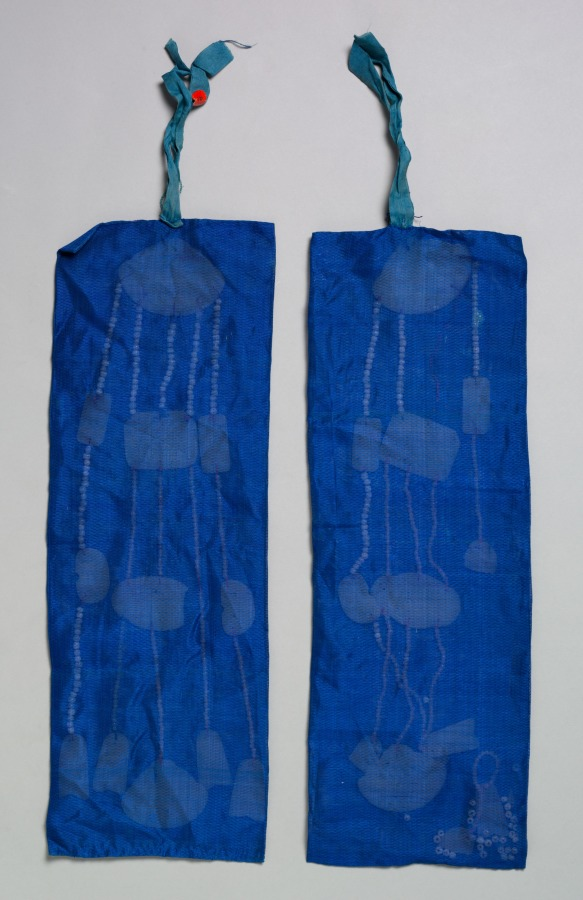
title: Jade String Pendant (right) for the Royal Ceremonial Costume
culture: Korea, Joseon dynasty (1392–1910)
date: late 1800s–early 1900s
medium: Blue silk, gauze weave and plain weave; jade and beads (2 sizes)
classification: Garment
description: This is a set of royal ceremonial robe and accessories worn by a high-ranking court official for attending special state ceremonies. The set consists of an inner coat, an outer coat, a skirt, a back apron, a crown, a pair of jade tassels, a tablet, and a belt.